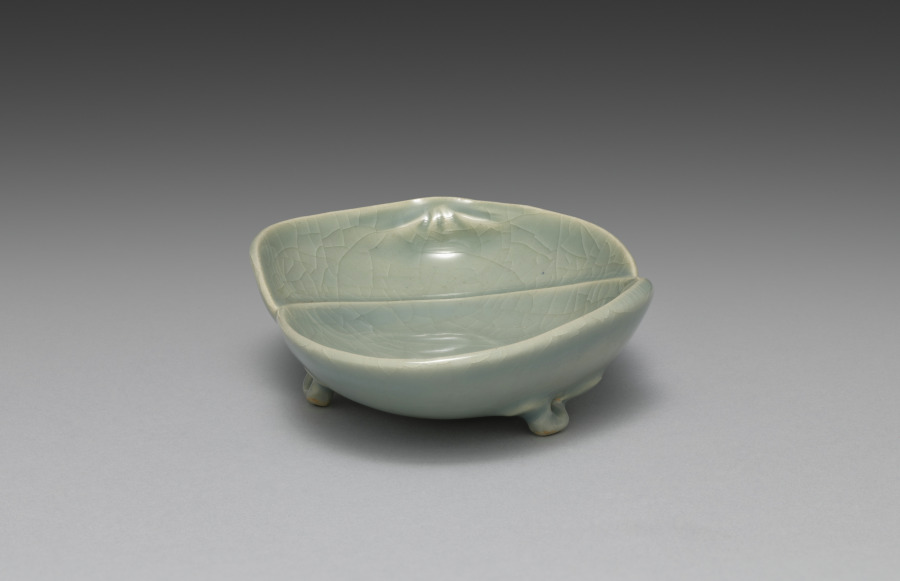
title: Dish from Saucers with Matching Shells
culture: Japan, Meiji period (1868–1912)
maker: Seifū Yohei III (Japanese, 1851–1914)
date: 1893–1914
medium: Porcelain with molded design and green crackled glaze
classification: Ceramic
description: Yohei III’s main output for his sophisticated clientele was in the form of tea sets and dining sets. He created a range of dishes in green glazes. He often produced in pairs, sets of five, or sets of ten. The set of five dishes with a more complex form is described as having a “water-colored glaze” (mizuiroyū). These are shaped like clam half shells, a reference to a game in which shell halves painted with narrative scenes or a variety of motifs must be matched back together by the players. The dishes have molded details to articulate the shell forms, and the crackling across each shell adds another dimension to the surface. Each dish is set on three small feet, formed by a pinched piece of clay and attached to an unglazed area on the underside of the dish. Curiously, while four of the dishes are stamped with the artist’s mark, one has instead a signature carved into the base.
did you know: The saucers are meant to look like matched halves of clam shells in reference to a once popular game.